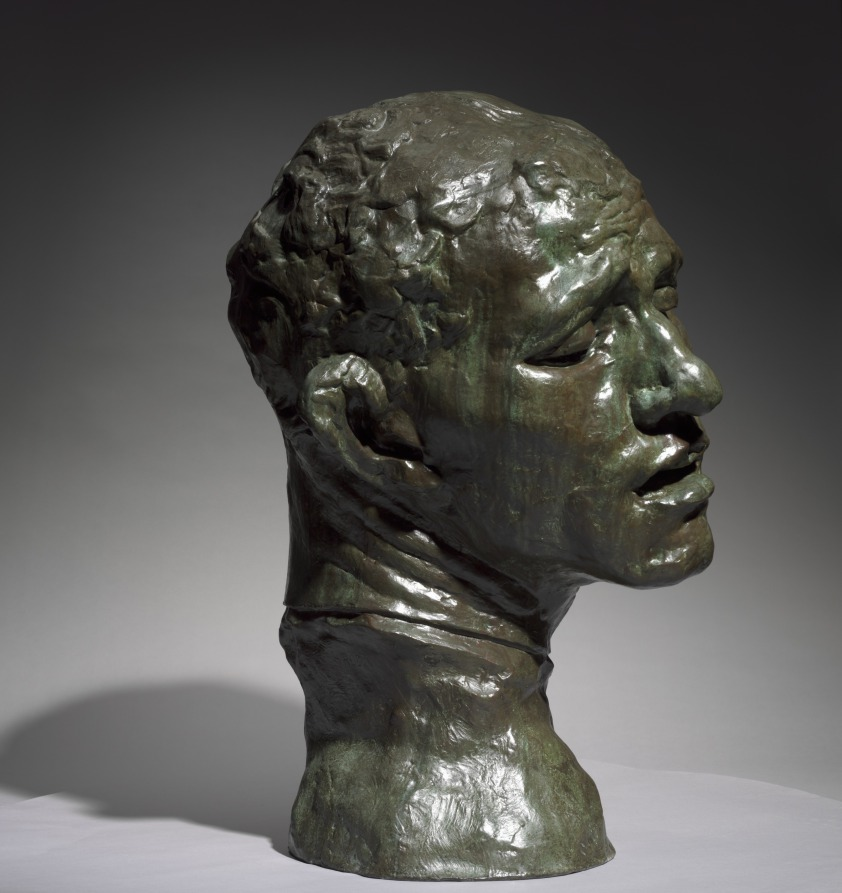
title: Heroic Head of Pierre de Wissant, One of the Burghers of Calais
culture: France, 19th century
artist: Auguste Rodin (French, 1840–1917)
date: 1886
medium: bronze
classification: Sculpture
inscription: inscribed at neck, left: A.Rodin; inscribed lower back: Alexis Rudier/Fondeur-Paris.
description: This sculpture depicts one of the figures in Rodin’s large public monument The Burghers of Calais (1884–89), featuring six French men who volunteered to be taken prisoner by the English in exchange for lifting the siege of Calais during the Hundred Years War (1337–1453). Pierre de Wissant’s anguished expression suggests extreme mental suffering as he contemplates his expected execution. Rodin exhibited a life-size version of the figure as an independent work before completing the monument. He later made multiple versions in various sizes and media.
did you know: This sculpture depicts the head of a figure from Rodin's large public monument The Burghers of Calais (1884-89). The CMA also owns a plaster version of the head.